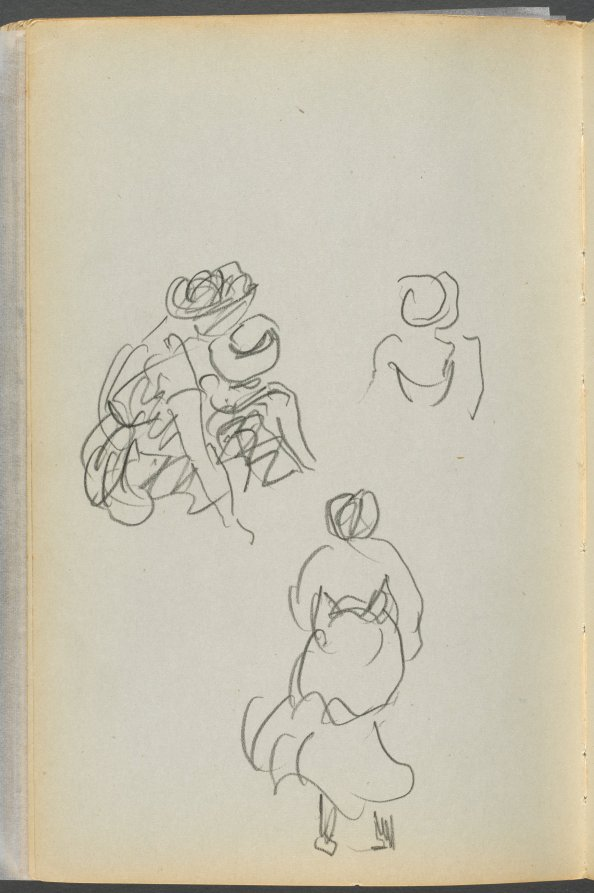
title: Sketchbook- The Granite Shore Hotel, Rockport, page 172: Figures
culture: America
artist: Maurice Prendergast (American, born Newfoundland [now Canada], 1858–1924)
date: 1905–10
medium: graphite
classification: Bound Volume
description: This sketchbook contains 72 pages of pencil drawings and 9 watercolors of Cape Ann. On the inside of the cover Prendergast wrote the address of the Granite Shore Hotel in Rockport, Massachusetts.